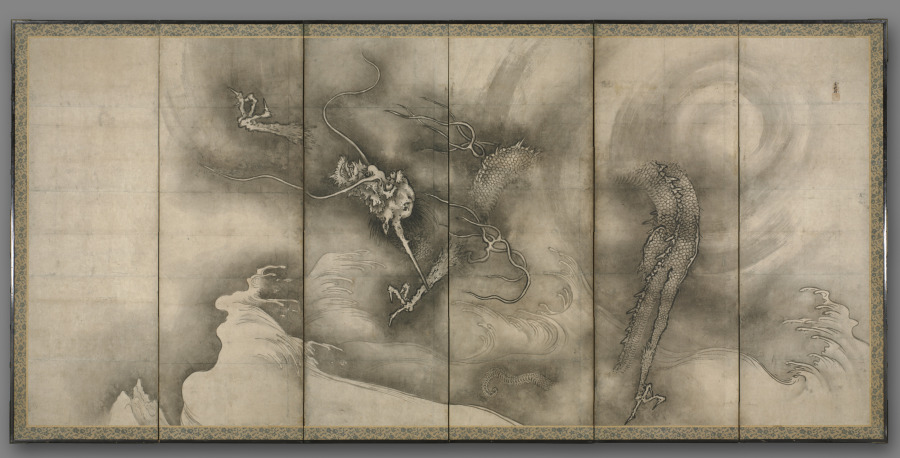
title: Dragon and Tiger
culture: Japan, Muromachi period (1392–1573) to Momoyama period (1573–1615)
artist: Sesson Shūkei (Japanese, c. 1492–c. 1577)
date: c. 1546–56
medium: One of a pair of six-panel folding screens; ink on paper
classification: Painting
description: In Chinese cosmology, dragons produce rain clouds. The dragon disappearing into and reemerging from clouds in this painting seems to generate rough waves in the water below, pulling it toward the sky. The shape of the foreground wave is indirectly sampled from a painting by 13th-century Chinese painter Yujian, a handscroll once owned by the Ashikaga military rulers of Japan. Sesson must have known the famous painting though copies, and made a copy of his own. Here, the wave reinforces the powerful quality of the dragon.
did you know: Sesson's dragon, winding in and out of clouds, may have taken inspiration from Chinese Ming-dynasty works in the style of 13th-century Chinese painter Chen Rong.